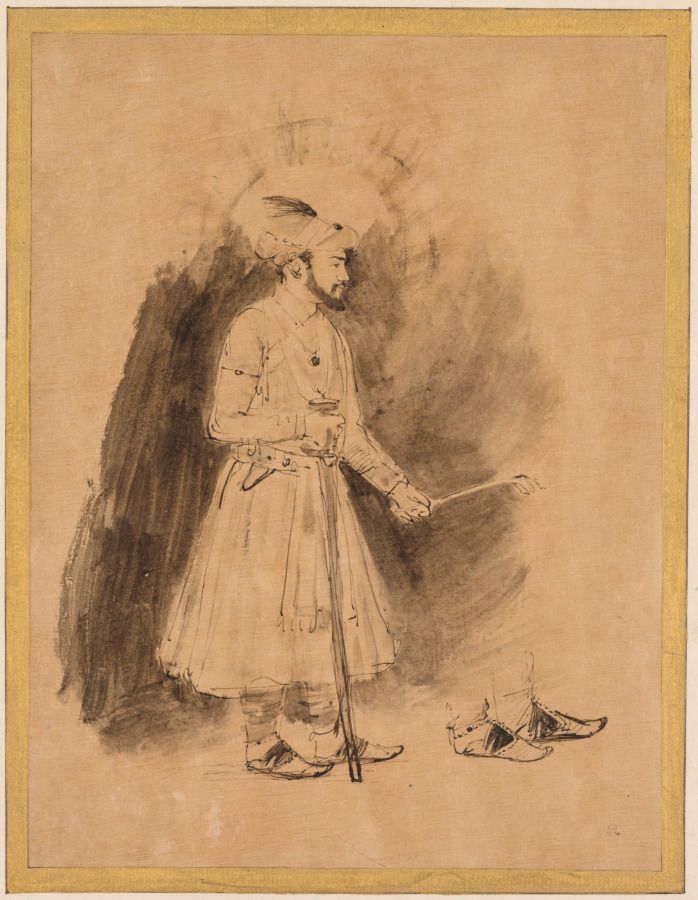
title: Shah Jahan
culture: Netherlands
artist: Rembrandt van Rijn (Dutch, 1606–1669)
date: c. 1656–61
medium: pen and brown ink and brush and brown wash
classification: Drawing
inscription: On verso of secondary support, upper center, in graphite: Portrait of; upper center, in brown ink: Portrait of Sháh Jahán Emperor of Hindustan [inscription in English] / Shah Jahan Padshah [inscription in Persian]; upper right, in graphite: Ouseley / written by Sir Gore Ou[seley] 1809; lower left, in graphite: 334; fragment of old mount (now removed), in blue pencil: 3[crossed out with black ink]; fragment of old mount (now removed), in gray ink: Portrait of Sháh Jehán / Emperor of Hindûstan; in black ink: 5[written over 5 in graphite] Indian Prince [underlined]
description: Rembrandt’s drawing portrays Shah Jahan, the ruler of the Mughal Empire from 1628-58. It is one of twenty-three drawings that Rembrandt made after Indian miniatures, which he had very likely studied in an album then in Holland. By the 18th century, the album had been dismantled, and the model for this drawing now resides at the Schloss Schönbrunn, Vienna. Rembrandt imposed his characteristic realist tendencies on a more detailed, formal, and stylized model, bringing the shah to life with especially fine pen strokes on the face and shoes mixed with evanescent brown ink washes around the figure that introduce a dynamic interplay of light, shade, and figure. Above the shah’s head, he scratched away parts of the ink and paper to create a nimbus shape that frames the profile. His meticulous technique and use of a rare and expensive Japanese paper suggest that he regarded his drawings after Mughal paintings as exceptional.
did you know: The Mughal ruler portrayed in this drawing carries a fly swatter in his left hand.